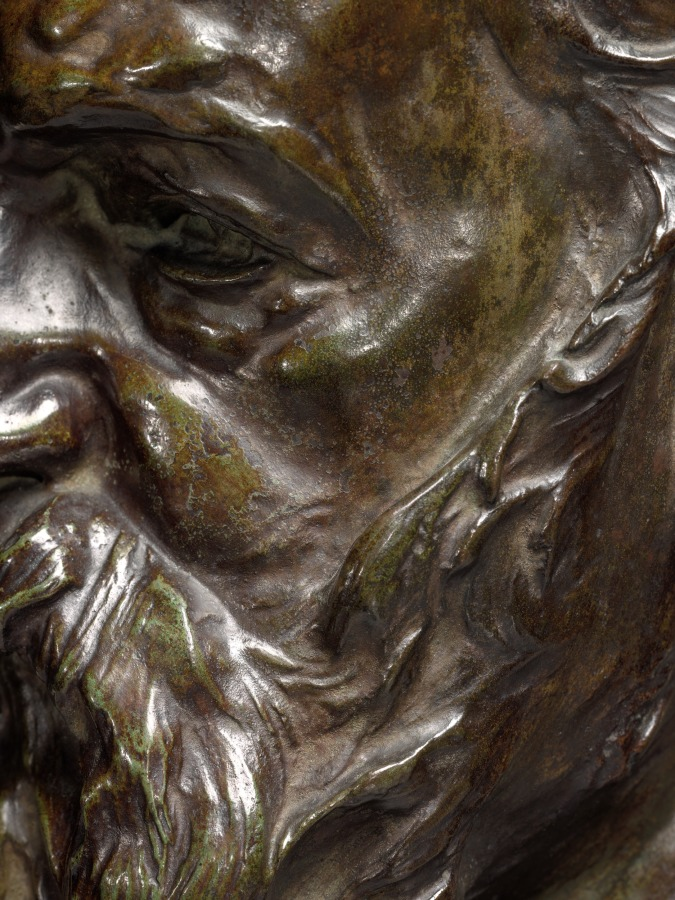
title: Bust of Victor Hugo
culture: France, 19th century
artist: Auguste Rodin (French, 1840–1917)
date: 1883 modeled; cast by 1917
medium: bronze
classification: Sculpture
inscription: inscribed on back: "A. Rodin" signed "Rodin" (back, lower left)